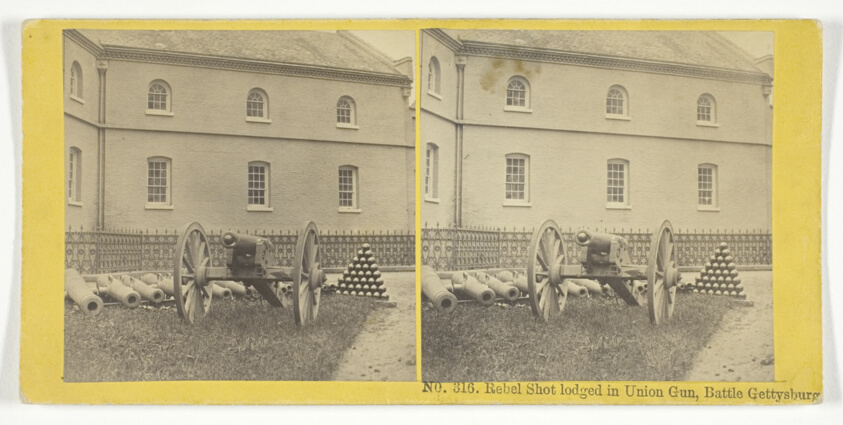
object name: Photograph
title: Rebel Shot lodged in Union Gun, Battle Gettysburg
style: 19th century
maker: Kilburn Brothers (American, active 1855-1875)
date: 1855/75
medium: Albumen print, stereo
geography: New Hampshire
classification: photography; photograph; albumen silver print; stereograph (albumen)